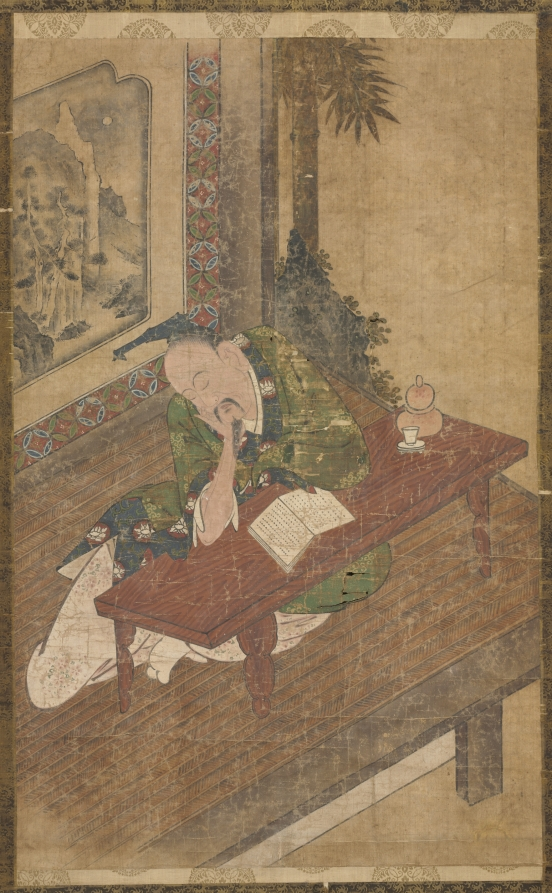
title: Sleeping Poet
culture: Japan, possibly Edo period (1615-1868)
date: c. 1700s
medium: color on silk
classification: Painting